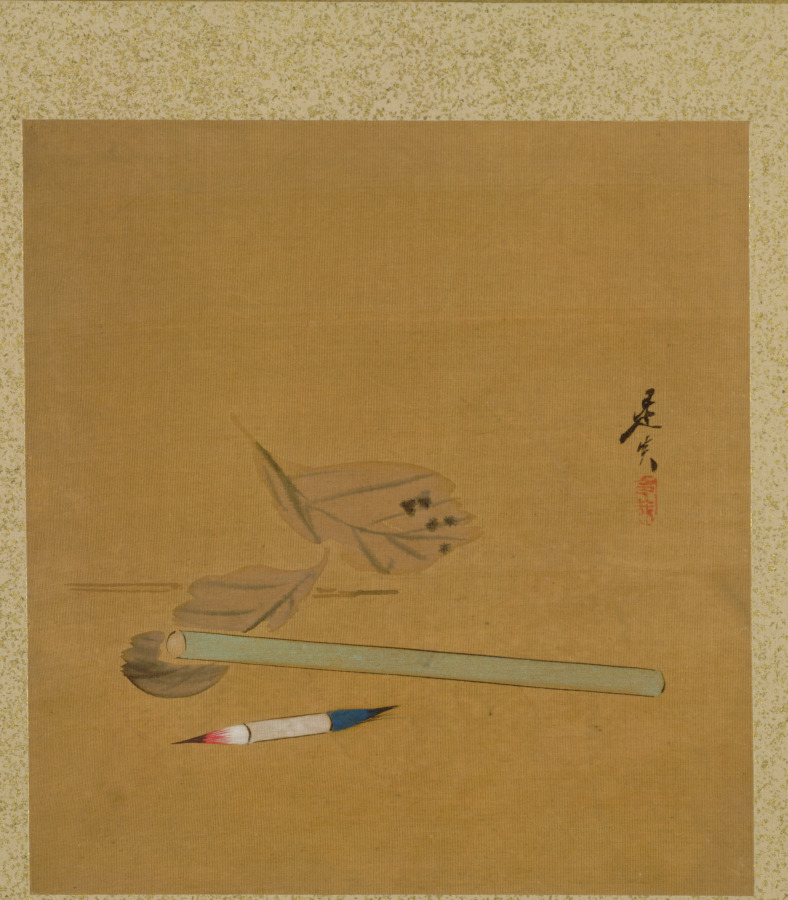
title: Brush, Holder, and Leaves from Album of Paintings by the Venerable Zeshin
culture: Japan, Edo period (1615–1868)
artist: Shibata Zeshin (Japanese, 1807–1891)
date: 1847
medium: leaf in accordion-style album; ink, color, and gold on silk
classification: Bound Volume